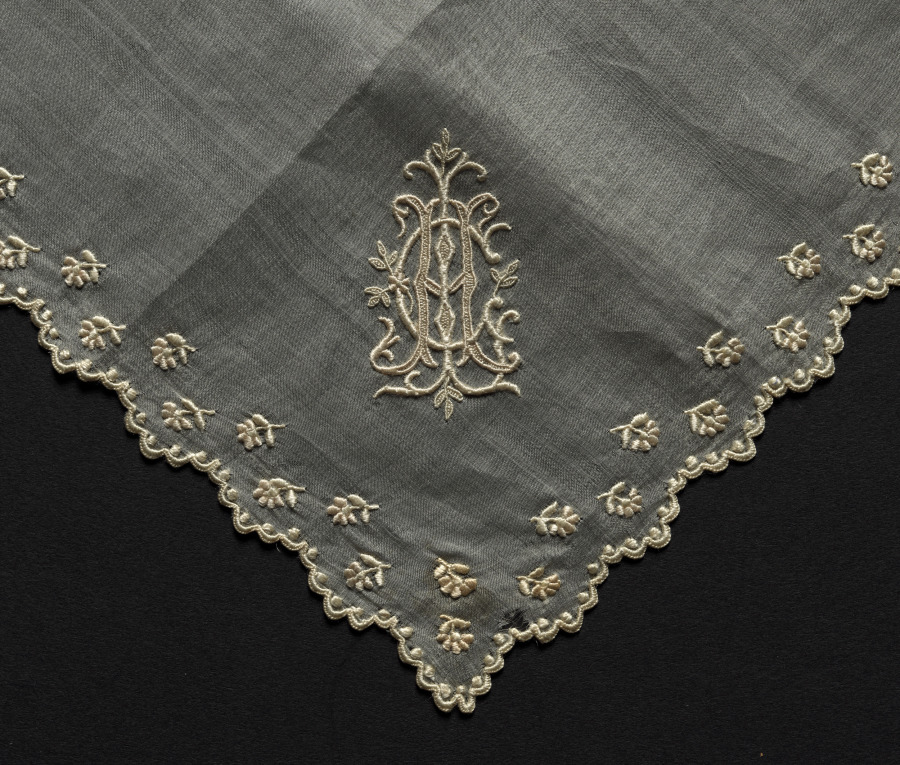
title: Embroidered Handkerchief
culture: Philippines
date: 1880–99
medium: Plain weave piña, silk embroidery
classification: Embroidery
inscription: monogram "L.C.H." in one corner.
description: This square handkerchief is made of piña fiber cloth in plain weave. All four edges are finished with a hand-embroidered cotton border of small repeating floral motifs. One corner bears the embroidered monogram “L. C. H.,” the initials of its first owner, Lilian Converse Hanna.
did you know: Sallie Perkins (Mrs. Jacob B. Perkins) gifted this handkerchief to Lilian Converse Hanna (Mrs. S. Prentiss Baldwin) before the latter’s marriage in 1898.